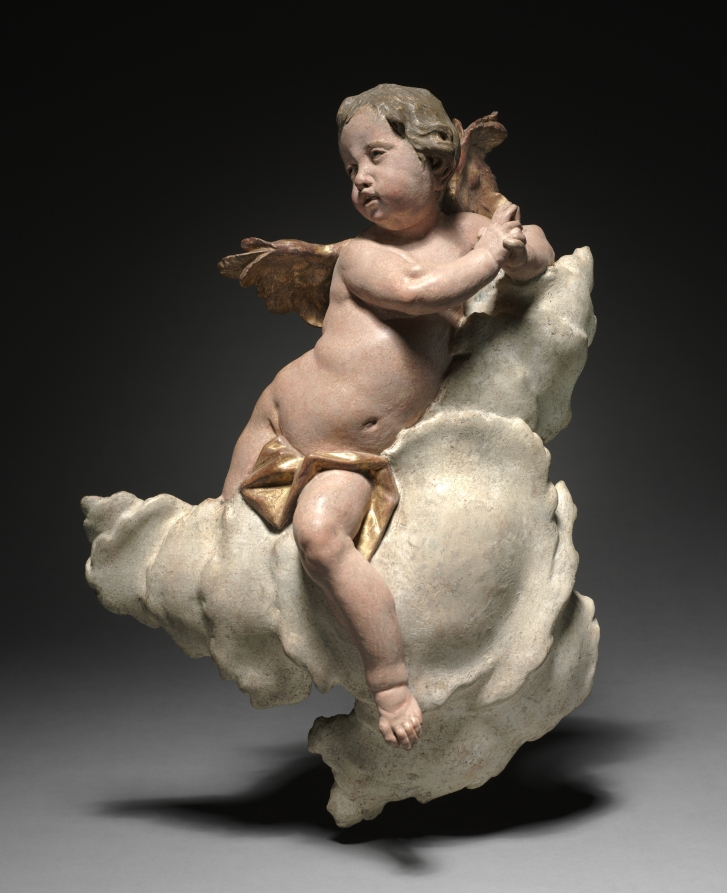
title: Putto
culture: Germany, Munich, 18th century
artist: workshop of Ignaz Günther (German, 1725–1775)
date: c. 1760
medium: painted and gilded wood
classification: Sculpture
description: This charming winged putto reclines on a cloud, hands clasped in an attitude of adoration. It is probably a fragment of a large decorative scheme of a church, perhaps the Johanneskirchen near Munich.